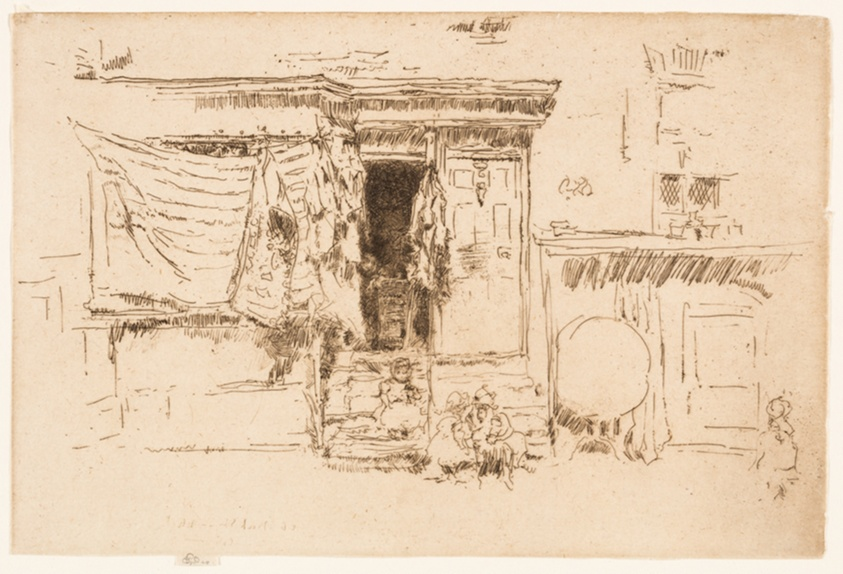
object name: Print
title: Rag Shop, Milman's Row, Chelsea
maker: James McNeill Whistler (American, 1834-1903)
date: 1887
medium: Etching and drypoint with foul biting in black ink on cream laid paper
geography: United States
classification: etching; foul biting; print; prints and drawing; drypoint; paper